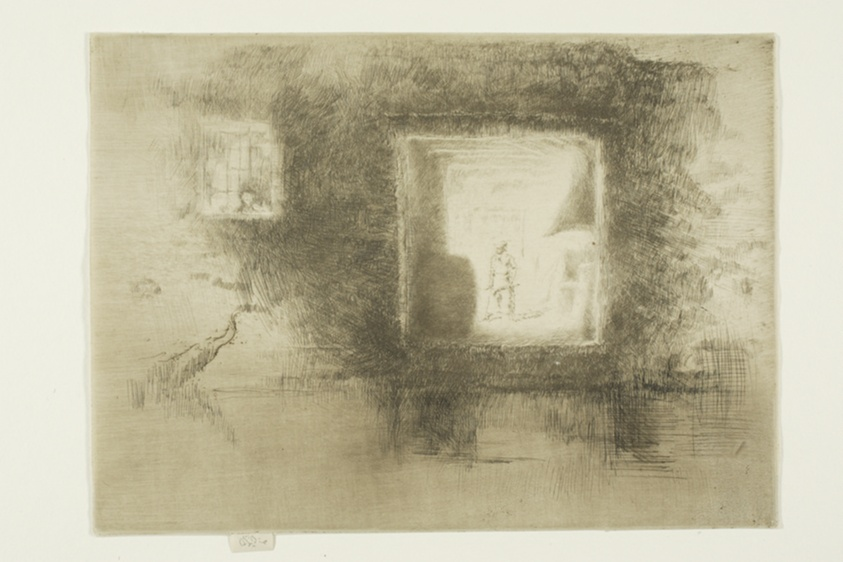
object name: Print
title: Nocturne: Furnace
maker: James McNeill Whistler (American, 1834-1903)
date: 1879/80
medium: Etching and drypoint with foul biting in black ink on cream laid paper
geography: United States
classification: etching; foul biting; print; prints and drawing; drypoint; paper